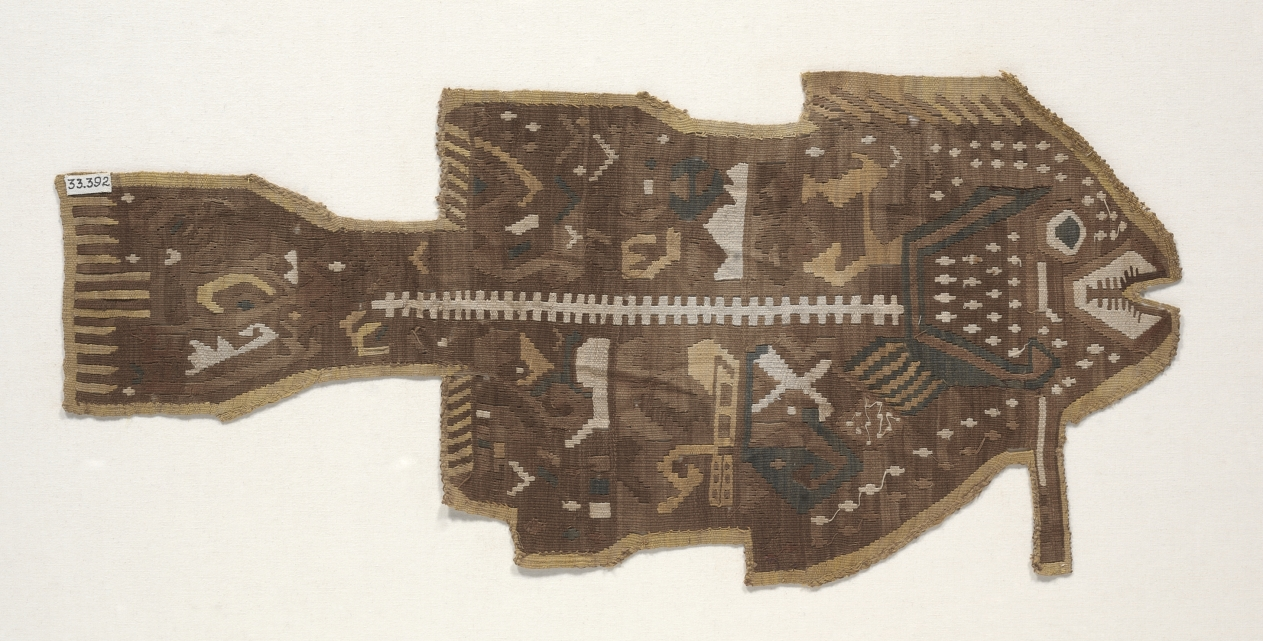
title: Fish-Shaped Applique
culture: Central Andes, Central Coast, Ychsma (Pachacamac) people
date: 1400–1532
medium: cotton and camelid fiber, tapestry weave with areas of eccentric weft floats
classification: Textile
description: This fish-shaped textile was originally stitched with others like it to a mantle, a shawl-like garment that was a staple of Andean clothing. Its partial “X-ray view,” which emphasizes the bony spine, is unique to the style of the Ychsma (yeach-mah), who lived on Peru’s central coast. In addition to referencing sources of food, marine subjects may also carry religious associations, as some coastal peoples of the period regarded the sea as a deity.